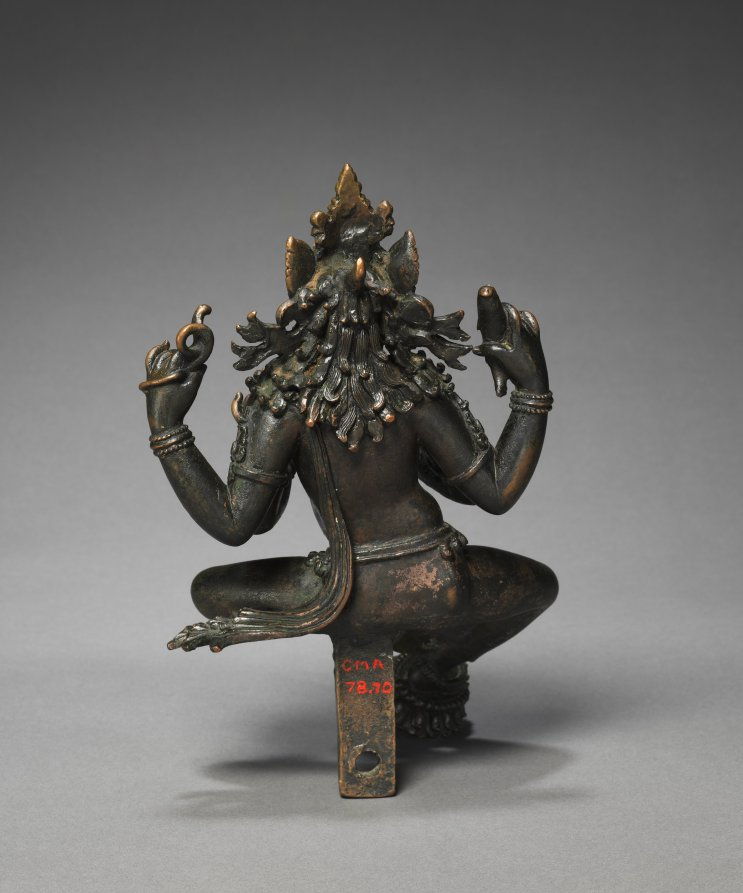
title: Varahi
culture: Nepal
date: c. 1300s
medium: bronze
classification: Sculpture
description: This Hindu goddess has the body of a young mother and the head of a female boar, which is the meaning of the Sanskrit word varahi, with the third eye of true knowledge. This sculpture was one of a set of seven goddesses associated with worship of the Hindu god Shiva or the mother goddess. The objects in three of her four hands reference the countercultural tantric Hindu practices of drinking revolting liquids from a bowl made from a skull. The fish implies the consumption of illicit food, and the snake pertains to the noose that keeps one bound in fear that leads to inevitable death. In tantric Hindu rituals, this goddess would aid the practitioners in overcoming their fears that keep them attached to ordinary life in the world, instead of reaching the liberated state of union with the creator.